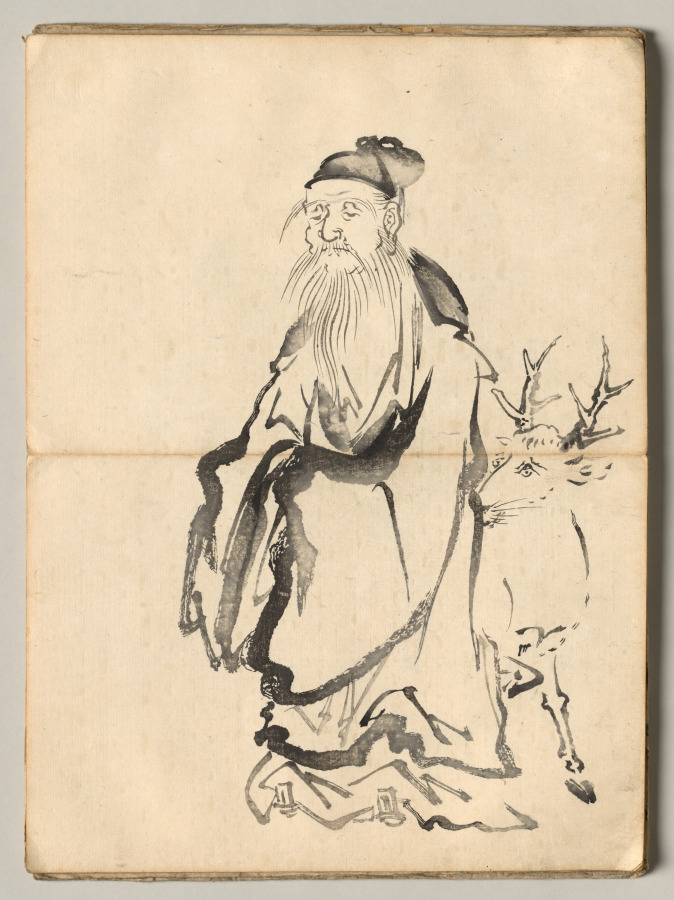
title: Jurojin from Ōkyo Picture Book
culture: Japan, Edo period (1615–1868)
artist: after Maruyama Ōkyo (Japanese, 1733–1795)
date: 1850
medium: accordion-style woodblock printed folding-book; ink and color on paper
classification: Bound Volume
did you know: This impression of a book of woodblock-printed designs is missing a spread that depicts a crane.